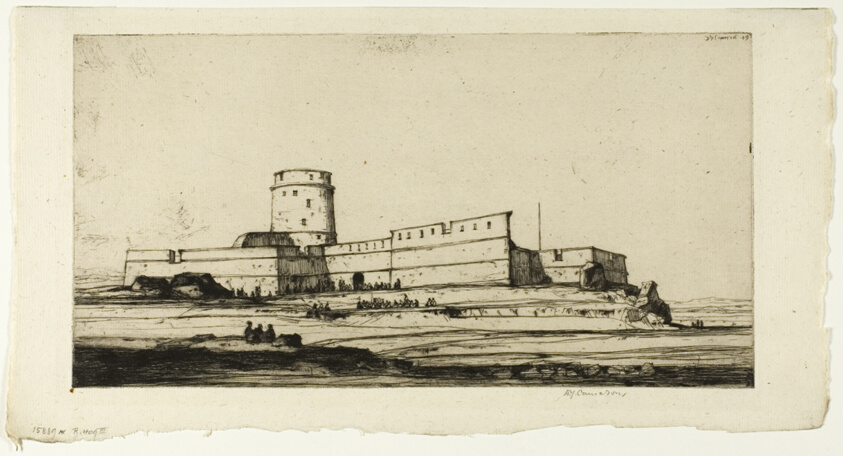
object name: Print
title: The Turkish Fort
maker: David Young Cameron (Scottish, 1865-1945)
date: 1909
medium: Etching and drypoint on ivory laid paper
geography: Scotland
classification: etching; print; prints and drawing